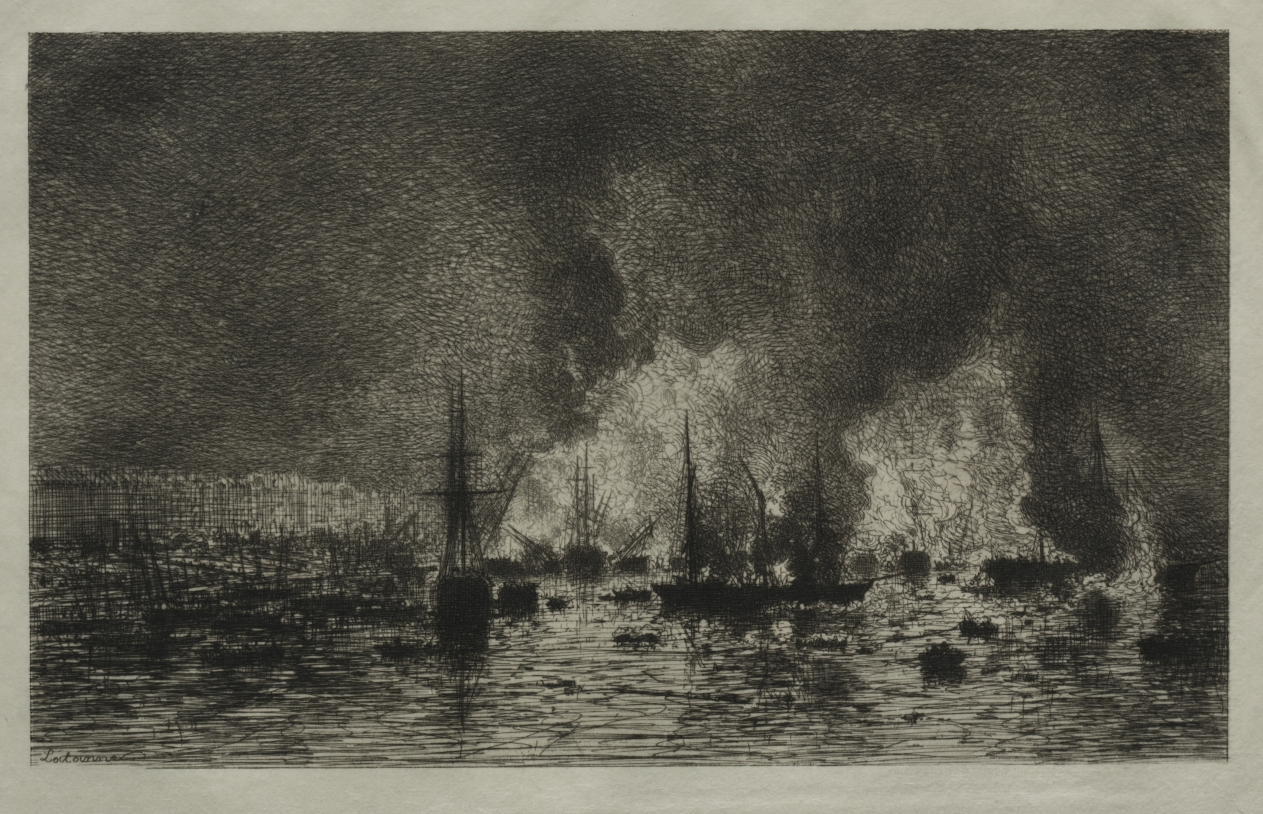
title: Fire in the Port of Bordeaux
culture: France, 19th century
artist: Maxime Lalanne (French, 1827–1886)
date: 1869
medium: etching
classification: Print